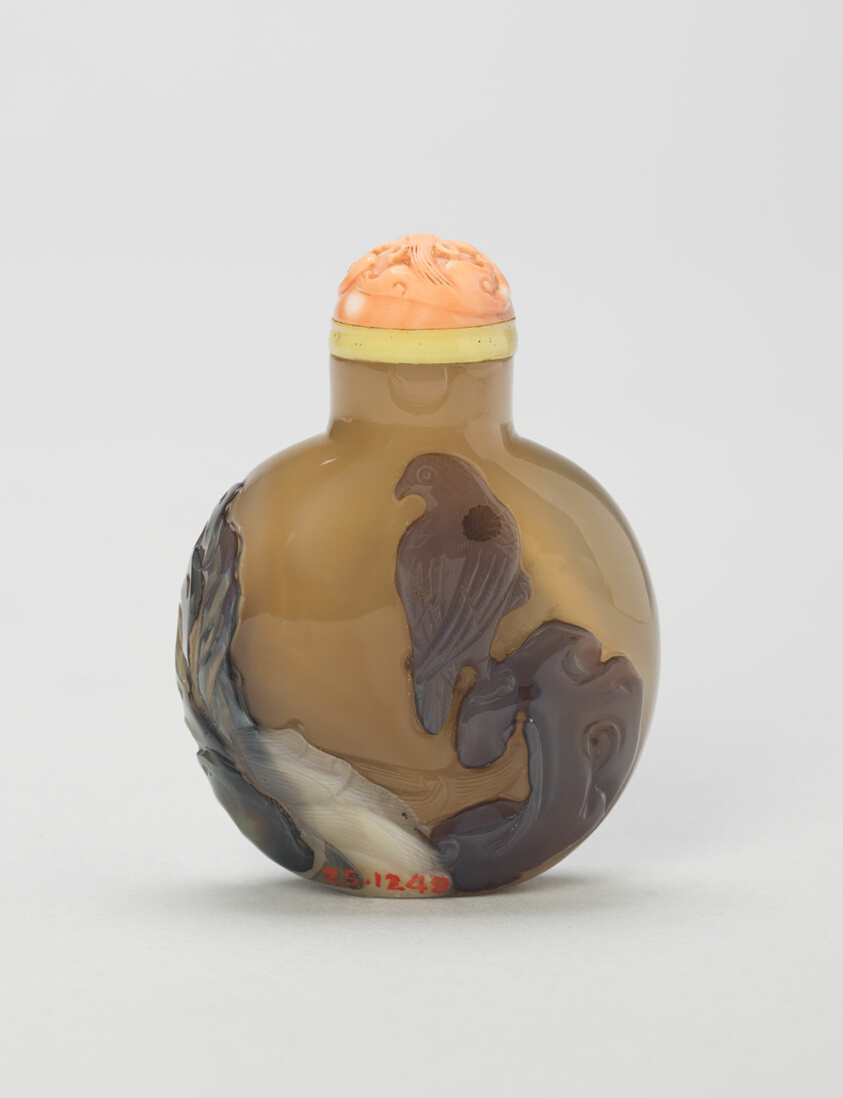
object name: Vessel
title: Snuff Bottle with Two Egrets Among Lotuses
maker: China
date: Qing dynasty (1644–1911), 1800–1900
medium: Grey, brown, and black agate with carged decoration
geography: China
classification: snuff bottle; asian art; vessel